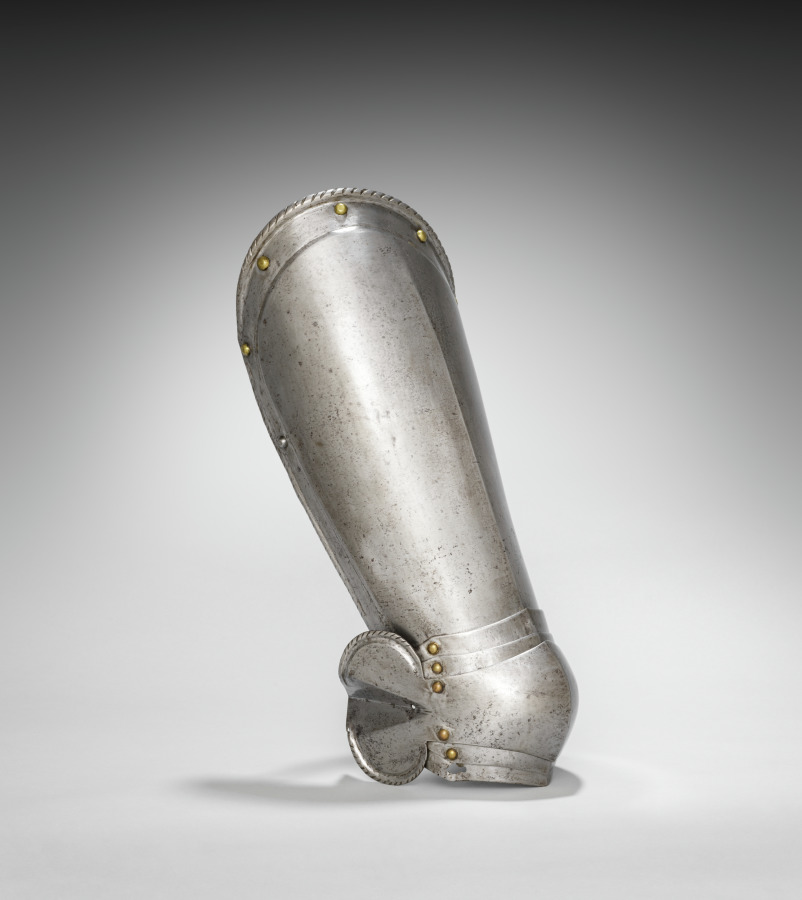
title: Proper Right Cuisse and Knee Cop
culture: South Germany, 16th century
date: c. 1560–1580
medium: steel, leather straps, brass rivets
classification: Arms and Armor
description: This armor was developed for the joust-a sporting combat between two mounted contestants. Although all of the elements of this armor date from the same period, they are not all from the same suit. This armor is thus called "composed." It also shows the asymmetry of jousting armor. The participants rode along a wall-like barrier known as a "tilt" with their left sides facing one another. Consequently, armor on that side of the body had to be thicker. Note the large plate (grandguard) over the left shoulder for extra protection. Also, the breathing holes in the helmet were placed on the right side (farthest from an opponent's lance) to avoid injuries from splinters. The bracket attached to the right breastplate is called the lance-rest, a shock-absorbing support designed to accommodate the lance when "couched" under the right armpit.